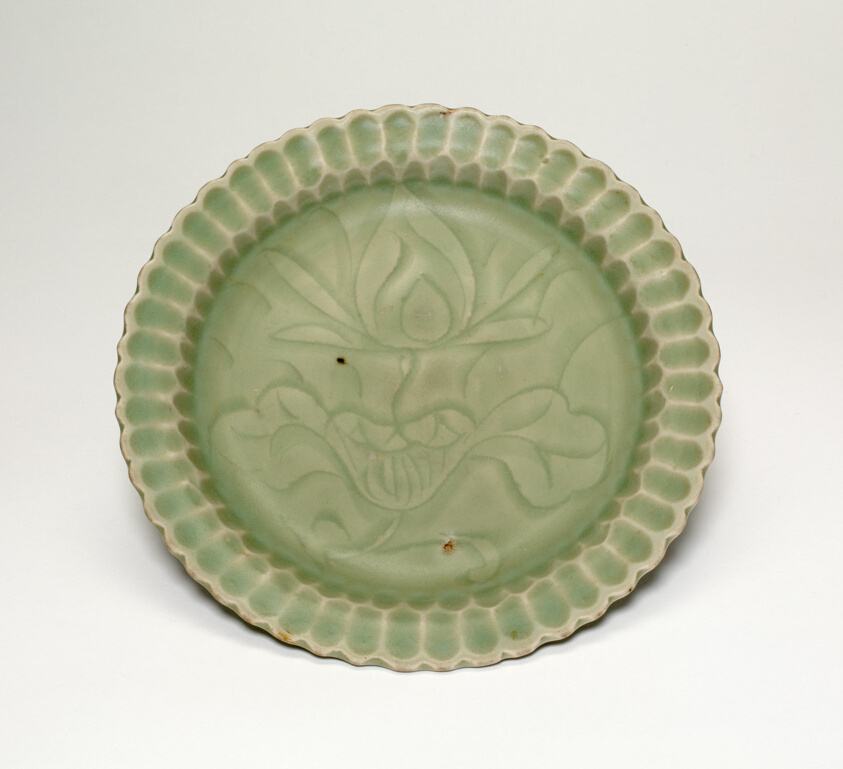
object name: Vessel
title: Foliate Dish with Lotus Flower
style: Chinese (culture or style)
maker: China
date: late Southern Song (1127–1279)/early Yuan dynasty (1279–1368), late 13th century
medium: Longquan ware; celadon-glazed stoneware with underglaze carved and mold-impressed decoration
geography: China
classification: dish (vessel); stoneware; asian art; ceramics; vessel